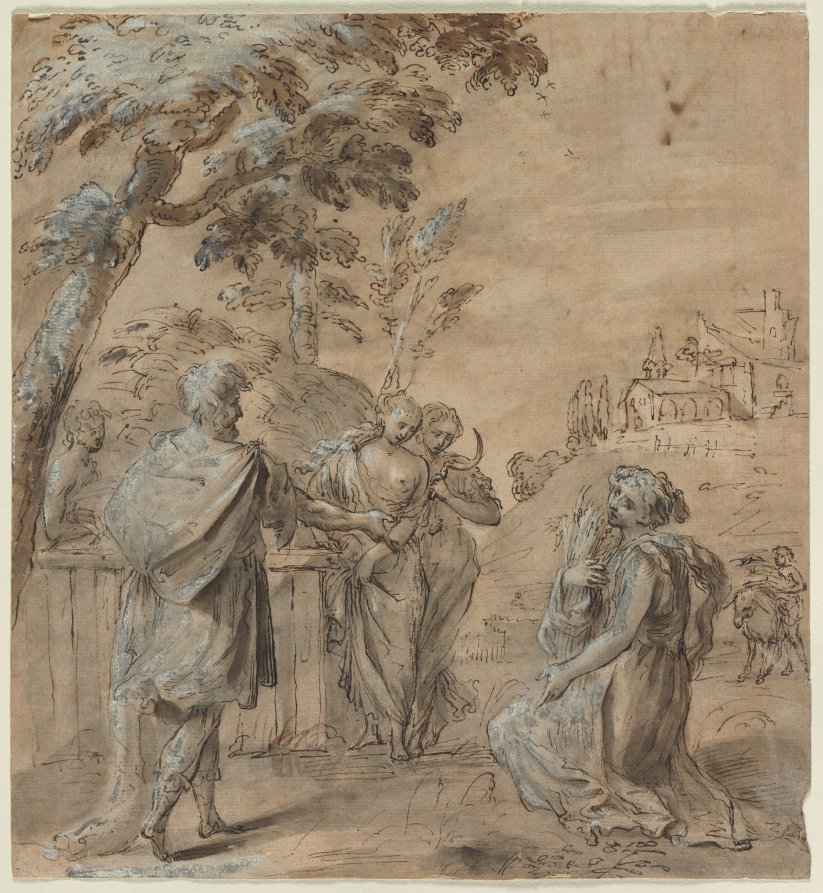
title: Ruth and Boaz (recto)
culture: Italy, 17th century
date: 1600s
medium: pen and brown ink and brush and brown wash over black chalk, heightened with lead white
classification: Drawing